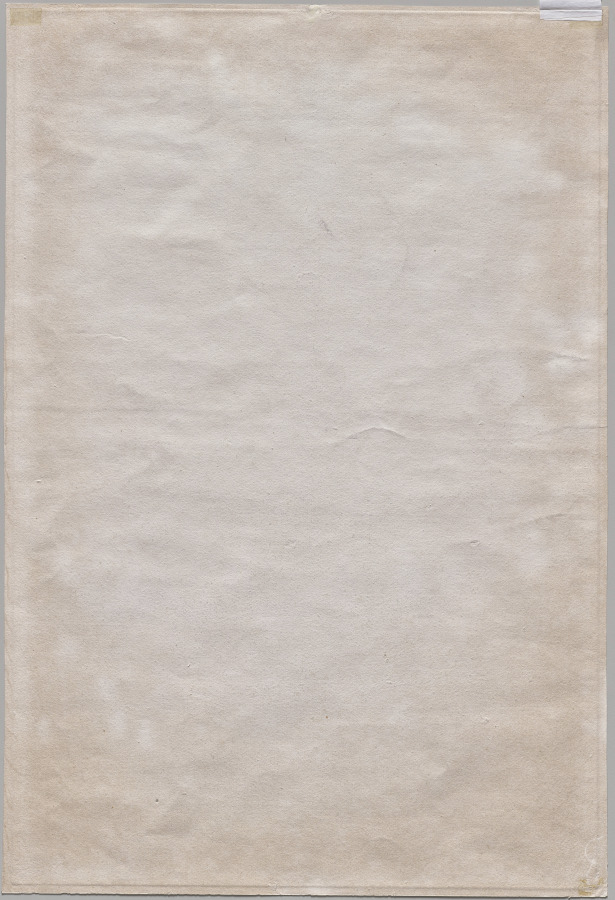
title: Morning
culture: Germany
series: Times of Day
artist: Philipp Otto Runge (German, 1777–1810)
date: 1803–5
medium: etching on heavy wove paper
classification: Print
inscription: Written in pencil on mat: "Morgen"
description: Phillip Otto Runge’s large-scale, four-part print series, Tageszeiten (Times of Day), is a landmark of German Romantic printmaking, capturing the “new art” promoted by Runge and his contemporary, Caspar David Friedrich, one rooted in a more personal and spiritual response to nature. Runge presents allegories of nature as a means to understand God and the sublime on earth. His four-part series represents not only the four times of day but also the seasons and the stages of human life, while contrasting eternal time with human time through various literary and religious references. Viewing the series from Morning to Night, seedlings emerge from the earth, bloom, decay, and die. Young spirits or children are born, mature, and grow old, eventually entering a sleep reminiscent of death. A female figure appearing in two scenes, possibly Mother Nature, inspires abundance and then embraces its decline, suggesting nature’s continuity despite human mortality. In each plate, Runge contrasts eternal time with human time, or spirituality with physicality, by contrasting the iconography in the borders with that in the centers.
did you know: After receiving a set of Times of Day as a gift from the artist, the German author Johann Wolfgang von Goethe (1749–1832) apparently exclaimed, “it’s enough to drive you crazy—beautiful, and mad at the same time!”